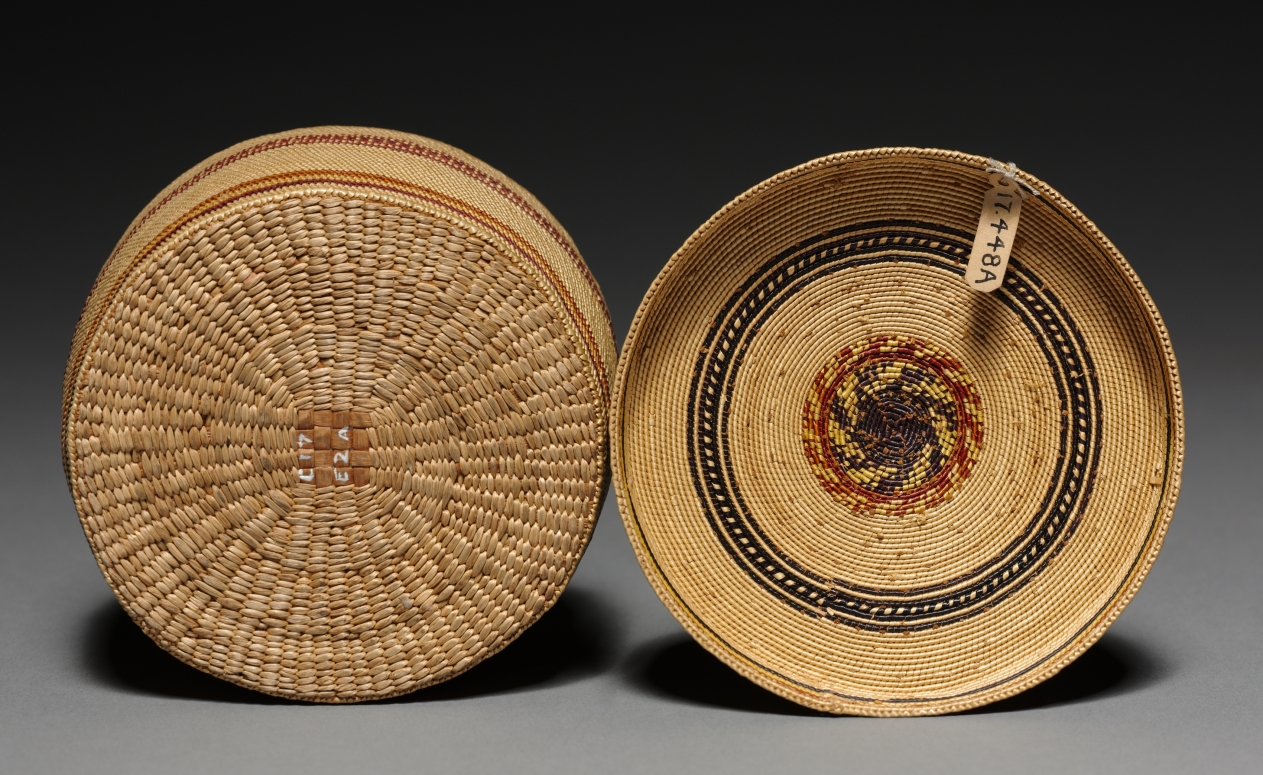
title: Lidded Bowl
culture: Northwest Coast, Makah, late 19th century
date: c 1900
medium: Cedar bark, deer grass; wrapped twining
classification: Basketry